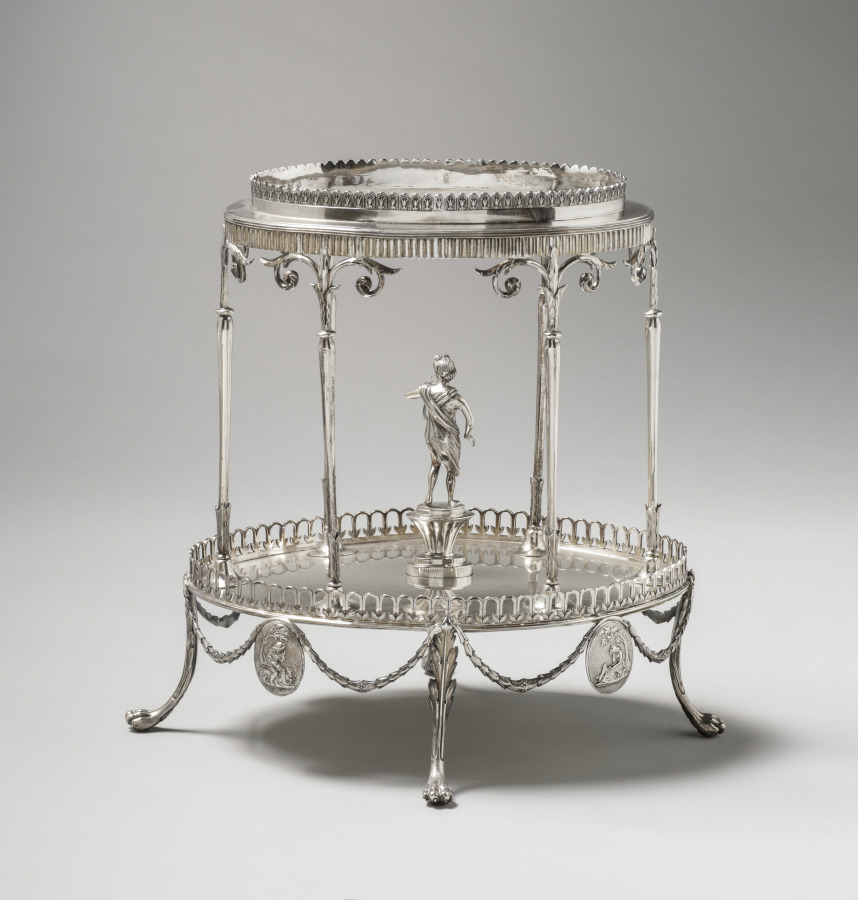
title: Centerpiece (metal stand)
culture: England, 18th century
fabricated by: William Pitts (British)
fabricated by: Joseph Preedy (British)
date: 1792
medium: silver and glass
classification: Silver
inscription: engraved: arms and crest of Bell Coat of arms with Bell impaling Brandling on flat platform.